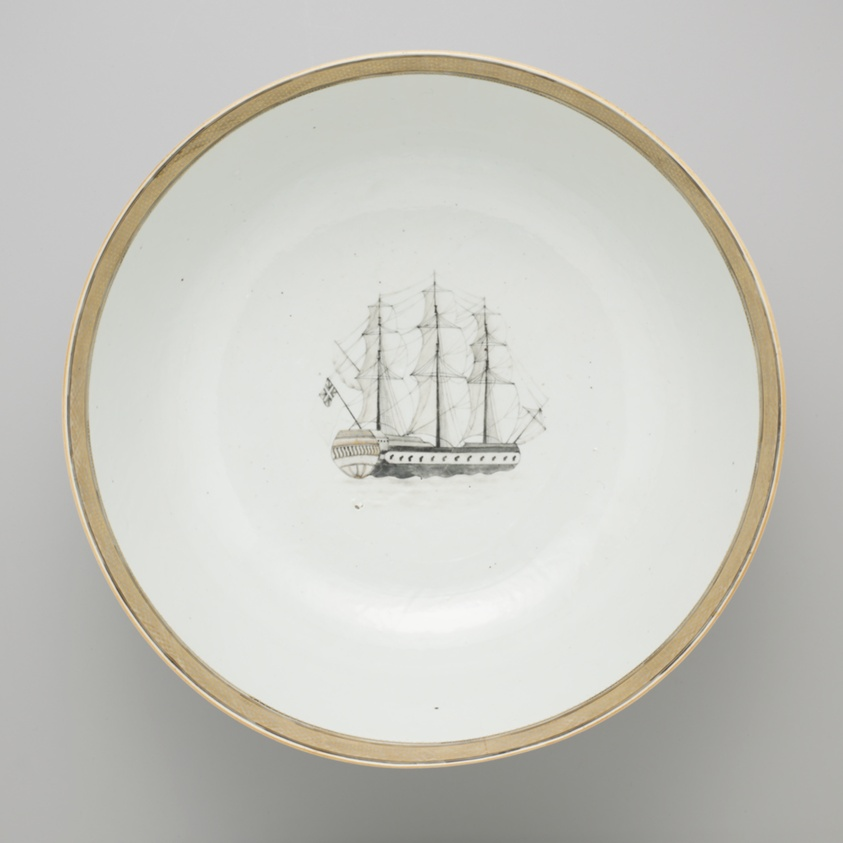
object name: Ceramics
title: Punch Bowl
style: chinese export, Export porcelain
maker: Artist unknown (Chinese, made for the American market); China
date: c. 1789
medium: Hard-paste porcelain, glaze, enamels in colors, gilding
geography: China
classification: punch bowl; chinese export porcelain; American market; art of the americas; ceramics; porcelain; decorative arts; pottery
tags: Canton, factory, port, cities, building, drinking